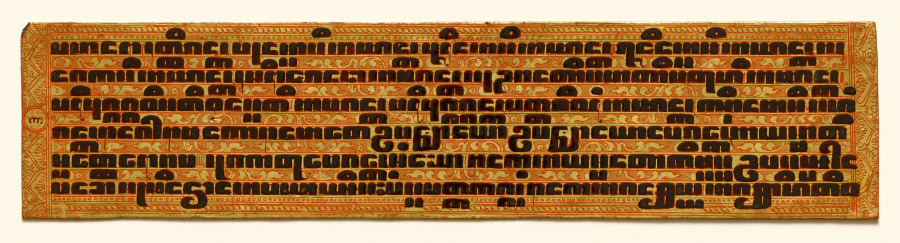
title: Text, folio 2 (verso) from a Kammavacha: Buddhist ordination text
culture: Myanmar (Burma)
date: 1800s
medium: Leaf: lacquer and gilding on cloth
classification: Manuscript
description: In premodern Burma, lay people commissioned lavishly ornamented manuscripts for ceremonial occasions, when officiants would read aloud from the text. Written in black lacquer, the text is in the language of Pali written in a Burmese script. It contains ordination rites and procedures for monastic ceremonies. The second to last page is covered with intricately drawn, winged celestial beings (nats) in gestures of praise. They fly amid intertwining vegetation—denoting bounty—that grows from serpentine forms that refer to rain clouds. Lionlike forms inhabit the space with them. The top and bottom covers are equally ornamented with jeweled floral patterning.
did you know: The Pali text of this manuscript is written in Burmese square script, which is also known as "tamarind seed script."